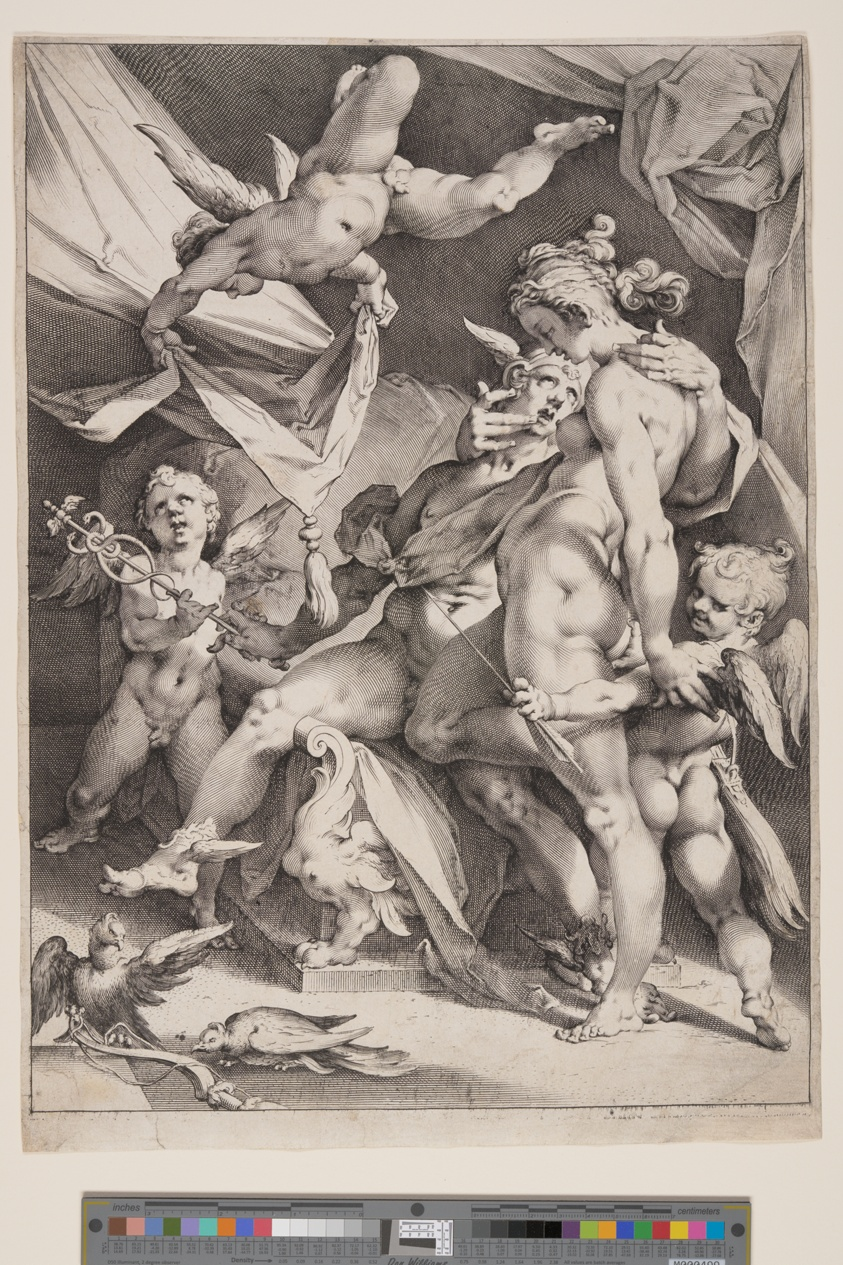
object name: Print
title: Venus and Mercury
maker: Jan Harmensz Muller (Dutch, 1571–1628); after Bartholomeus Spranger (Flemish, 1546–1611)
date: c. 1600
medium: Engraving on ivory laid paper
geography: Netherlands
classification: print; paper; prints and drawing; engraving